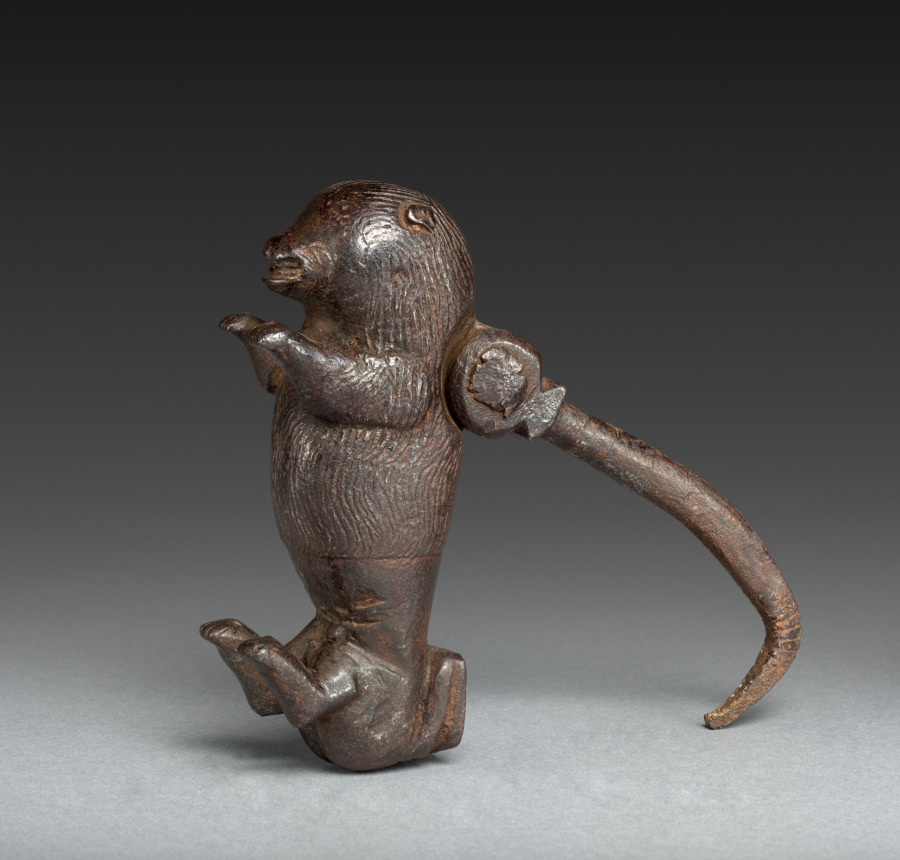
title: Doorknocker in the Form of a Lion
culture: Italy(?)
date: 1400s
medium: wrought iron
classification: Metalwork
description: Doorknockers such as this one were popular accessories for the homes of the wealthy during the Middle Ages. They are found in many different forms. The lion, symbolizing nobility, fortitude, and strength was highly favored.